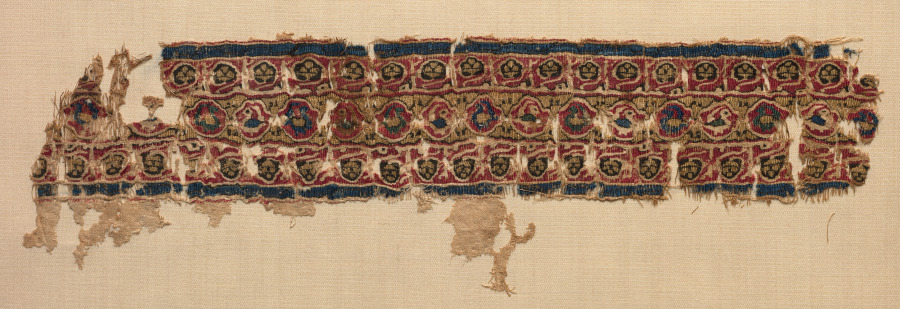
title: Fragment of a Tiraz-Style Textile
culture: Egypt, Fatimid period, Caliphate of al-Mustansir or al-Musta'li, c. AH 475-495 (A.D. 1081-1101)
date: 1081 – 1101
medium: tabby ground with inwoven tapestry ornament; linen and silk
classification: Textile